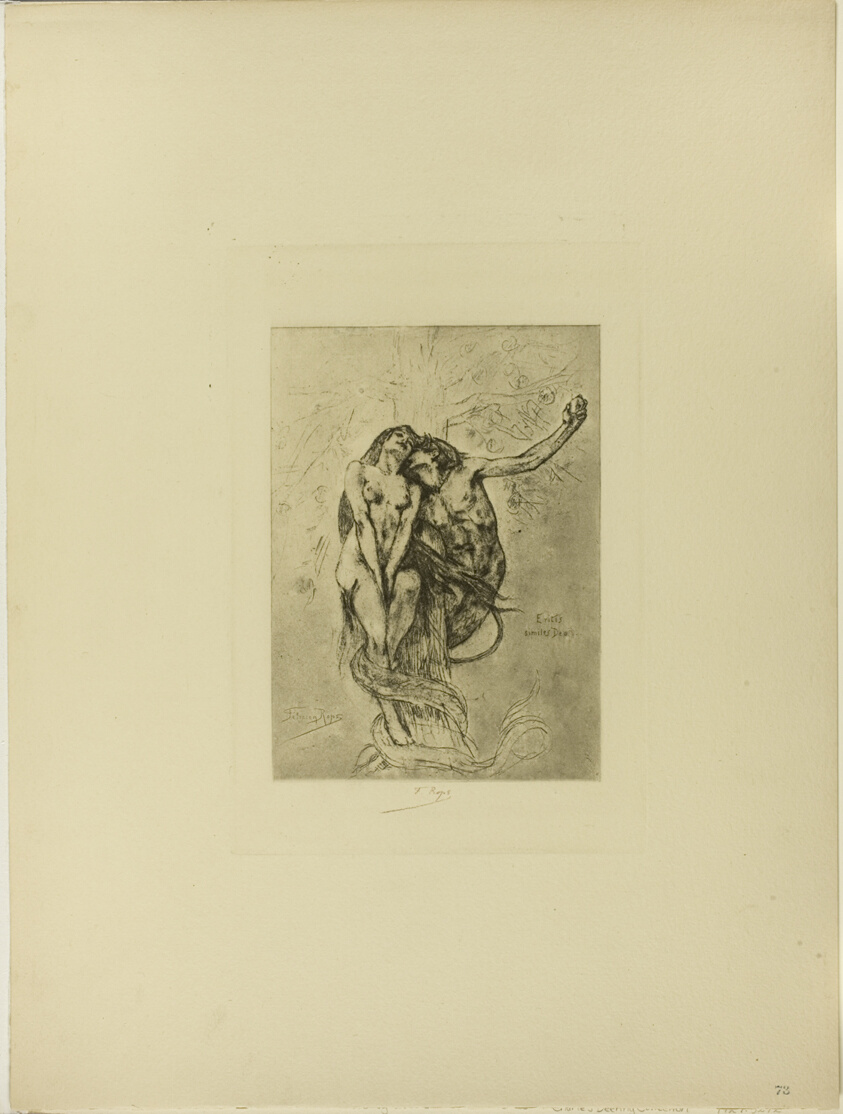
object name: Print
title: Temptation or the Apple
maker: Félicien Rops (Belgian, 1833-1898)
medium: Heliogravure, with hand-coloring, on cream wove paper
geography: Belgium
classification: photogravure; print; prints and drawing